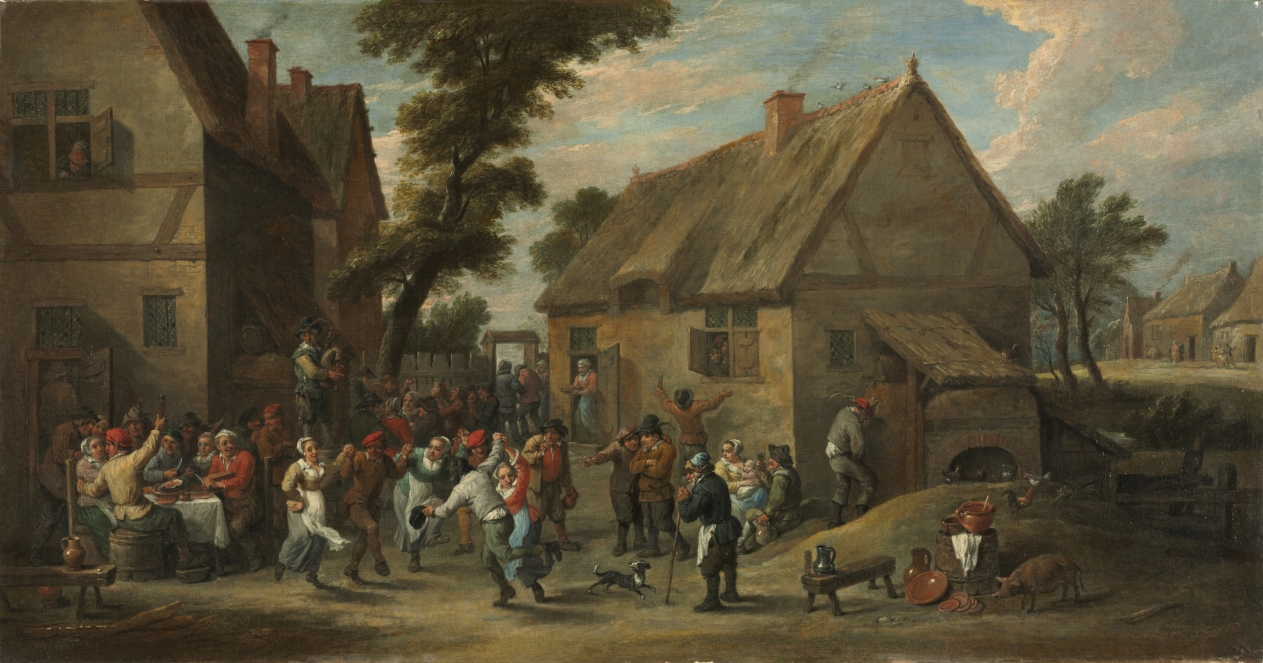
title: Village Festival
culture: Flanders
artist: David Teniers (Flemish, 1610–1690)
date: c. 1646–50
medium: oil on canvas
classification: Painting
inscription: Signed lower right: "D. TENIERS. FEC."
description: Depictions of peasant festivals, such as weddings, harvests, and village holidays became an extremely popular subject for Flemish artists during the 1600s. In his paintings of these festive occasions David Teniers the Younger (1610–1690), portrayed peasants dancing and playing music, focusing on the cheerful elements of peasant life. His images often feature close-knit family groups taking part in the celebration. Contrary to his predecessors, who often depicted broken and disorderly still life objects in their paintings, Teniers emphasized household objects in brass, ceramic, and glass in a perfect state to demonstrate the growing prosperity of the peasants.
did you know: Surviving drawings show that Teniers sketched many peasants from life, and similar figures appear throughout his peasant paintings from about 1640 to 1660.